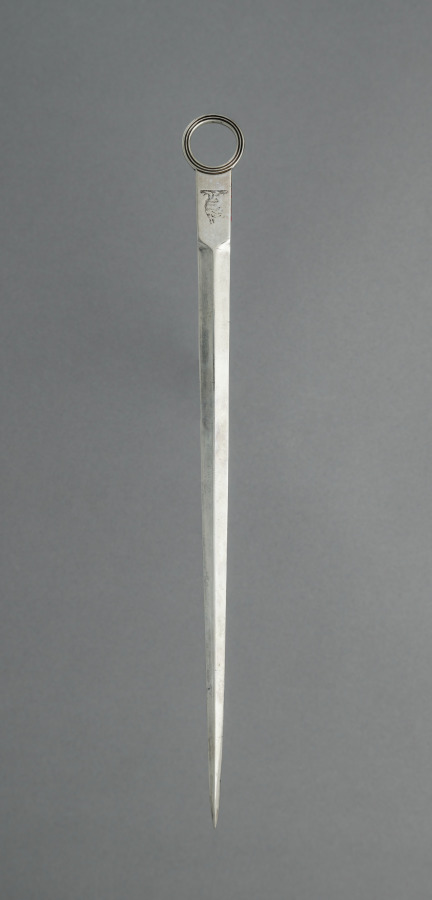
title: Skewer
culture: England, 19th century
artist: firm of William Eley (British)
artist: firm of William Fearn (British)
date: 1818–1819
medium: silver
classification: Silver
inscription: engraved crest on one side.